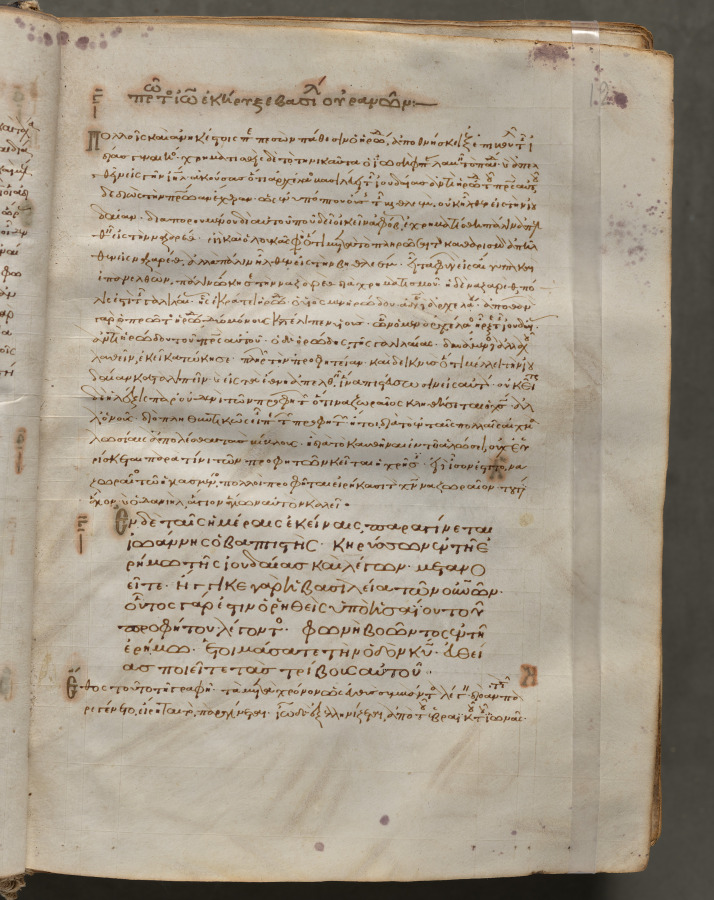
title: Text, folio 12 (recto), from a Gospel Book with Commentaries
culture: Byzantium, Constantinople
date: c. 1000–1100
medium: ink, tempera, and gold on vellum; leather binding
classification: Bound Volume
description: Each of the four gospels in this book opens on a page with brilliantly illuminated borders depicting the author of the text as well as birds-principally peacocks, symbols of the immortality of the soul-and fountains, representing the fountain of life and the salvation of the soul. This volume consists of 428 leaves with texts in Greek. Its level of sophistication suggests that it was probably written and decorated in a monastery in Constantinople.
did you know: Gospel Books were carried in procession through Byzantine churches.